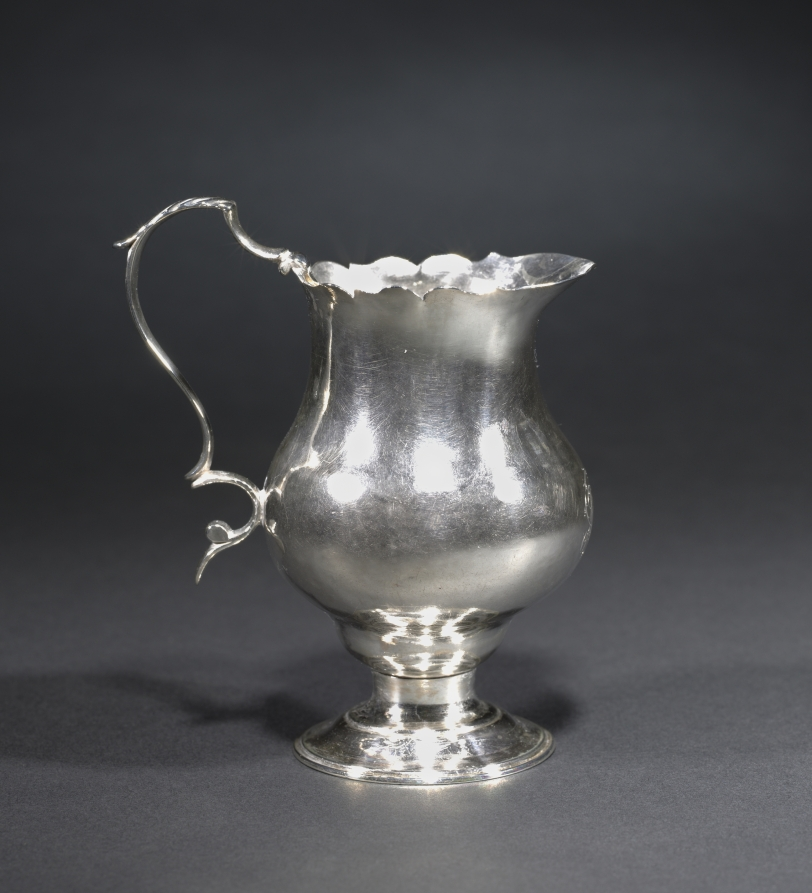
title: Cream Pitcher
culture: America, Massachusetts, Boston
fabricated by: Paul Revere II (American, 1735–1818)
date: c. 1765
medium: silver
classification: Silver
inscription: "P . . .H/to/P . . .E" in block letters under foot, and "MHP" in bright-cut script on front, opposite handle.